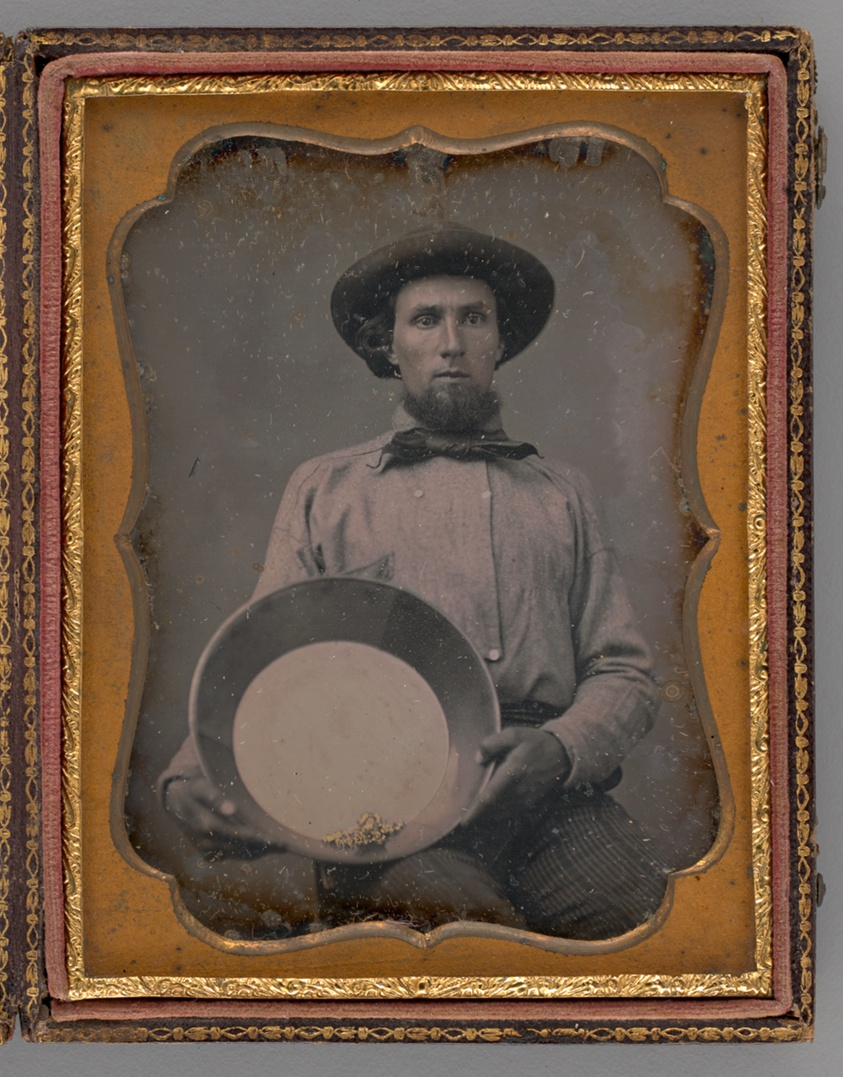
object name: Photograph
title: Untitled (Portrait of a Man Wearing a Hat, Holding a Mining Pan)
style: 19th century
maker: Unknown maker; American, 19th century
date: 1854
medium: Daguerreotype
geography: United States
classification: portrait; daguerreotype; portrait; photograph; photographic process; photography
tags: lundberg collection, photography, portrait, portraits, portraits: male subject, gold mining, gold rush